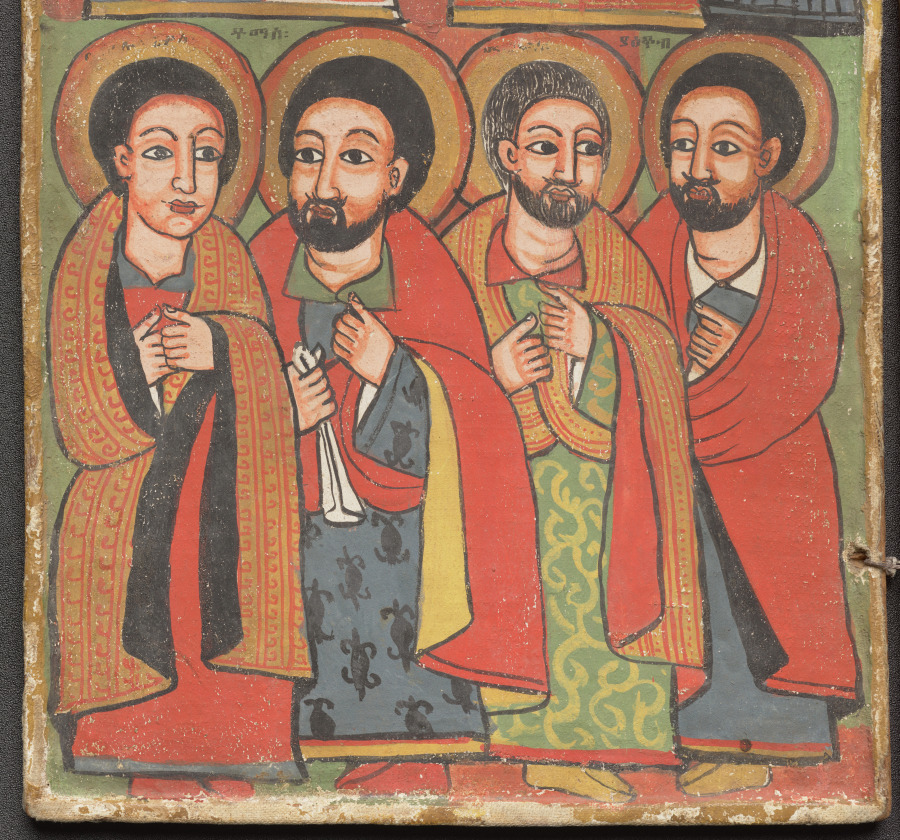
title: Diptych with Twelve Apostles & St. Paul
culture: Africa, East Africa, Ethiopia, presumably Gondär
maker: Workshop or Circle of Wäldä Maryam (Ethiopia, active mid- to late 1600s-early 1700s)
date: c. 1700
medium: Tempera, wood, textile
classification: Painting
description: Depicting 13 holy men, this diptych (two-panel painting) is sized for an Ethiopian Orthodox Christian church or elite home. It is painted in the bold, colorful style associated with royal court workshops from the early 1600s to the mid-1700s. Painter Wäldä Maryam (or someone he trained) set this scene of Christ’s apostles in the context of his homeland. Each saint wears fashionable clothing imported from India. While they are posed and dressed similarly to emphasize their group identity, the artist portrayed their faces and hairstyles individually. Captions in Ge’ez––an eastern African language dating to the 400s BCE––identify each by name.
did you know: Captions written in the language Gəˁəz identify each holy man by name. This African language is nearly 2,500 years old!